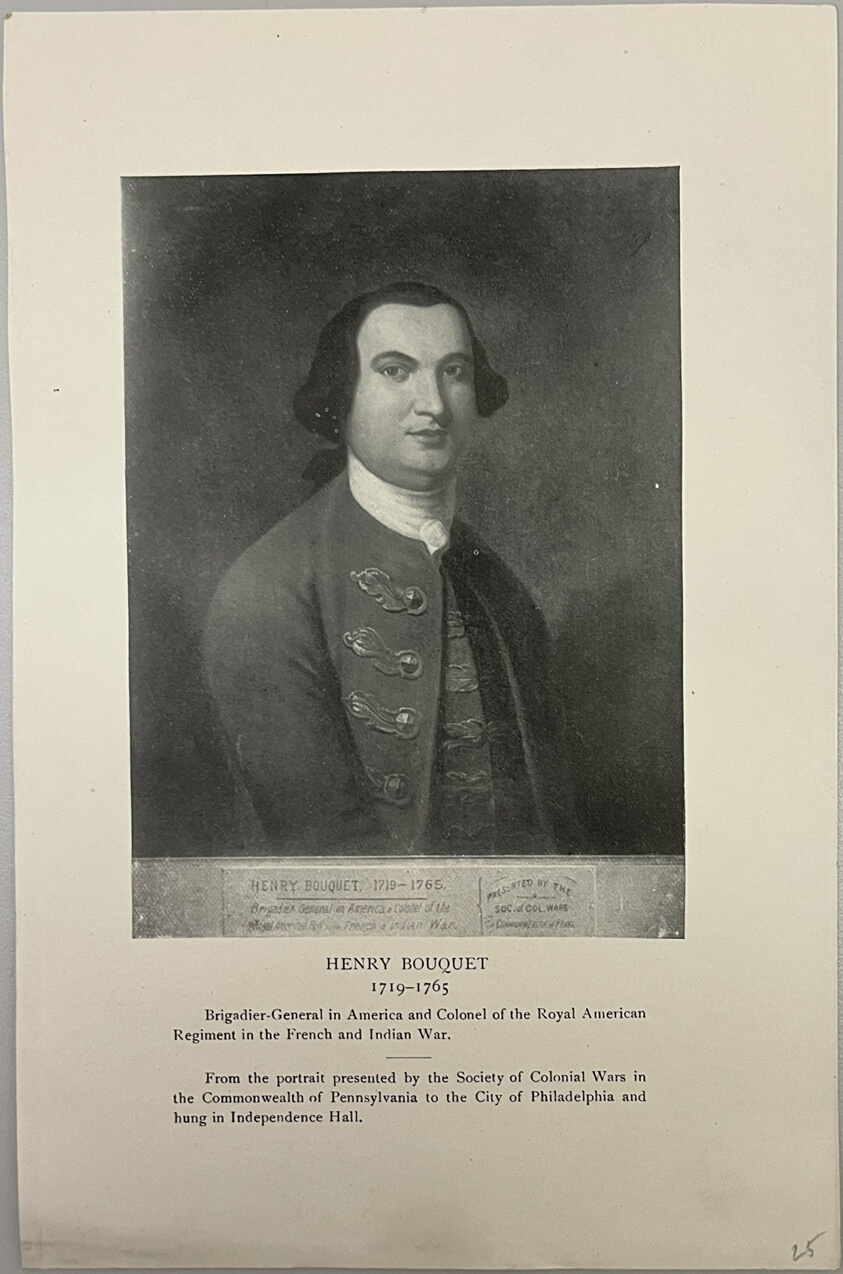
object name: Print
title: Henry Bouquet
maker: Artist Unknown (Likely American or British, 19th century)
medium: Photolithograph on paper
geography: United States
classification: reproduction; print; prints and drawing